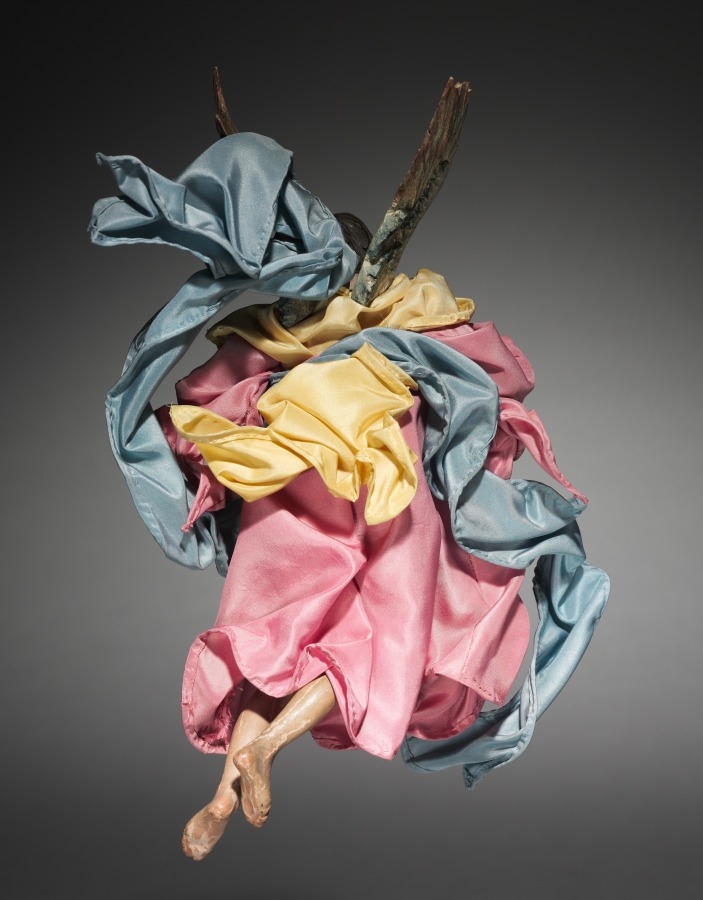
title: Figure from a Crèche: Angel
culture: Italy, Naples, late 18th-early 19th century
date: 1780–1830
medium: painted wood and terracotta with various textiles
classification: Sculpture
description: The practice of creating scenes of the Nativity for the home dates from the early 1700s in Italy, where people began to set up doll-like figures of about a foot or less in height. The custom was particularly popular in Naples around 1800, where crèche scenes (crèche means cradle, or crib) included many figures, whose heads and hands of painted terracotta, stuffed cloth bodies, and clothing adapted from contemporary local costumes gave them an amazingly realistic character. Representations of the birth of Jesus can be traced to the first few centuries of Christianity. Both living creatures and sculptural depictions of them were used from early times. By the late middle ages it was customary to create life-size figures of wood or stone, naturalistically painted, to represent the characters who participated in the events of Jesus's early life. These sculptures were then arranged in scenes illustrating one or both of the most important of these events, the Adoration of the Shepherds and the Adoration of the Magi-the three kings from the East who came to pay homage to the Christ child. Used in churches, these large figures were especially popular in Italy, Central Europe, Spain, and Portugal. This Object in Focus presentation was organized by Henry Hawley, Curator of Renaissance and Later Decorative Arts and Sculpture.